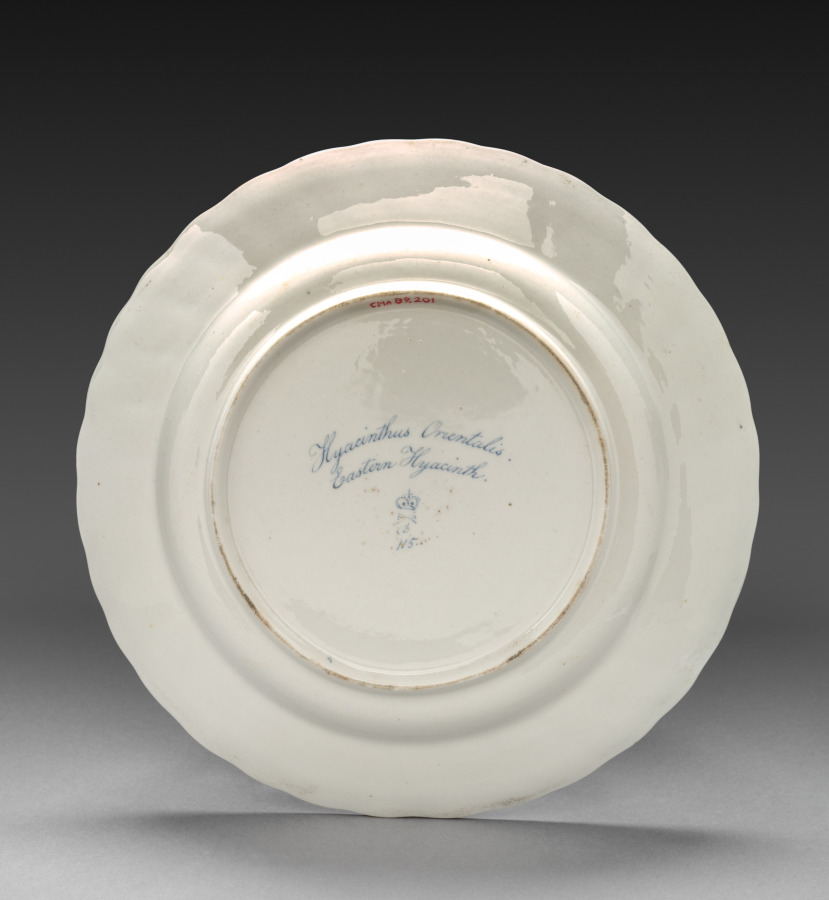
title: Plate from Dessert Service: Eastern Hyacinth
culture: England, Derby, 18th century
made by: Derby (Crown Derby Period) (British)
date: c. 1800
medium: porcelain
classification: Ceramic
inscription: inscribed in blue on back: Hyancinthus Orientalis./Eastern Hyacinth./crown/crossed batons and dots/D/115. Near edge: 9.